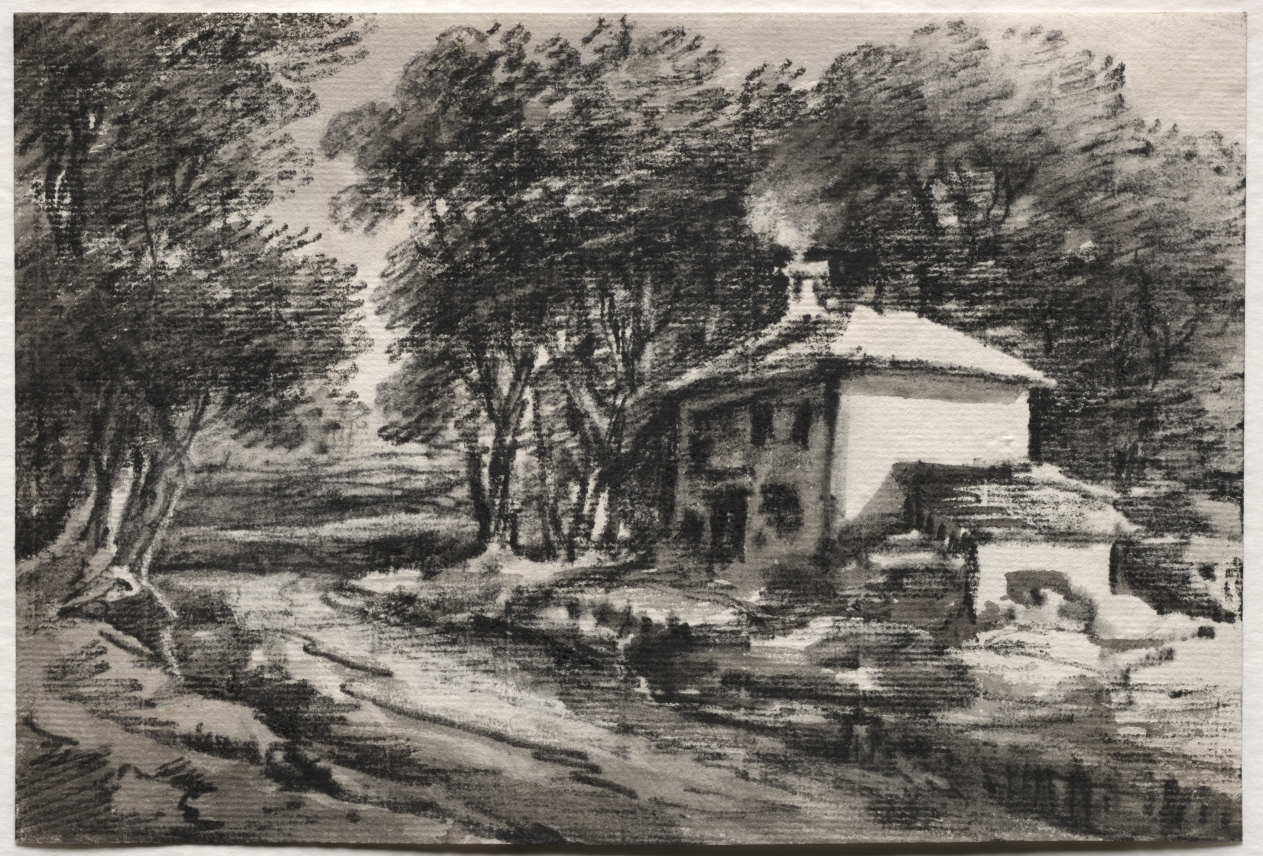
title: Landscape with Cottage (recto)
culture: England, 18th century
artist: Thomas Monro (British, 1759–1833)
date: c. 1820s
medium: black chalk and gray wash with scraping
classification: Drawing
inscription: verso, in graphite: A 16477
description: Dr. Thomas Monro is best known as a patron who exercised significant influence in the London art world in the late 18th and early 19th centuries, but he was also an amateur artist and competent follower of Thomas Gainsborough. The physician’s drawings were monochromatic, done in wash with additions of charcoal, chalk, or india ink in emulation of Gainsborough’s moody rural views. On the verso of the drawing is a mise-en-page of caricatures and a hillside—perhaps whimsically drawn by multiple artists at one of the doctor’s salons.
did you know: Dr. Thomas Monro established what became known as an "Academy," where artists gathered in the evenings to draw, at his home overlooking the Thames.